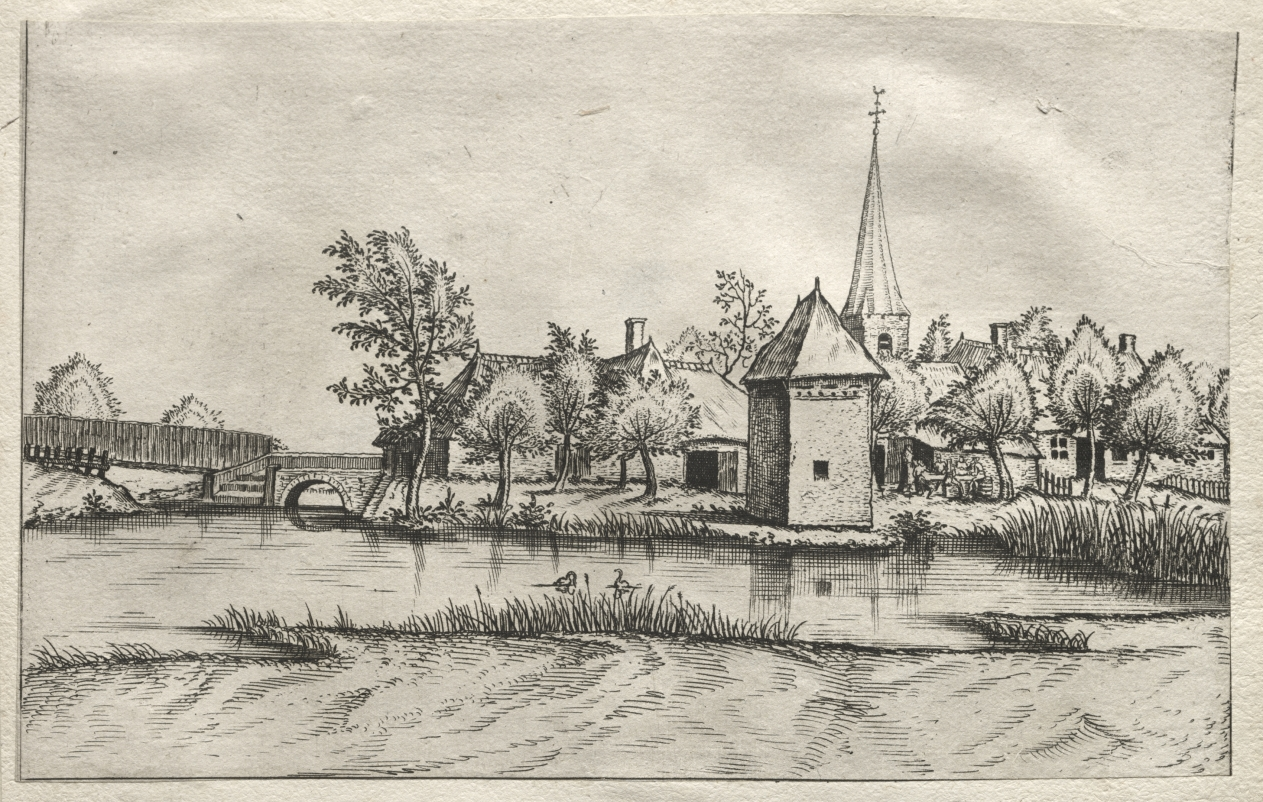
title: Views of Villages in Brabant and Campine: A Moated Village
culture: Flanders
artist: after Master of the Small Landscapes (Flemish)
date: c. 1561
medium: etching and engraving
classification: Print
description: Part of a second, larger series of 30 prints, this work illustrates a village scene around Brussels. The preliminary drawing is shown beside the print, which is reversed--a consequence of the printmaking process. While the engraver closely followed the composition of the drawing, the images are not exactly alike. The printmaker changed a number of details, such as removing the figure on the arched bridge and adding stairs leading to the water on the left. The most significant change, however, is the way the image was cropped--the sides cut off and the foreground enlarged--resulting in a change of perspective. In addition, the spontaneous quality of the drawing is virtually lost in the print. Compare the surface of the water and the reflections of the plants and buildings in these two works.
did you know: Though this and other towns in the same series share familiar features with some Netherlandish villages, none of the exact locales can be identified.